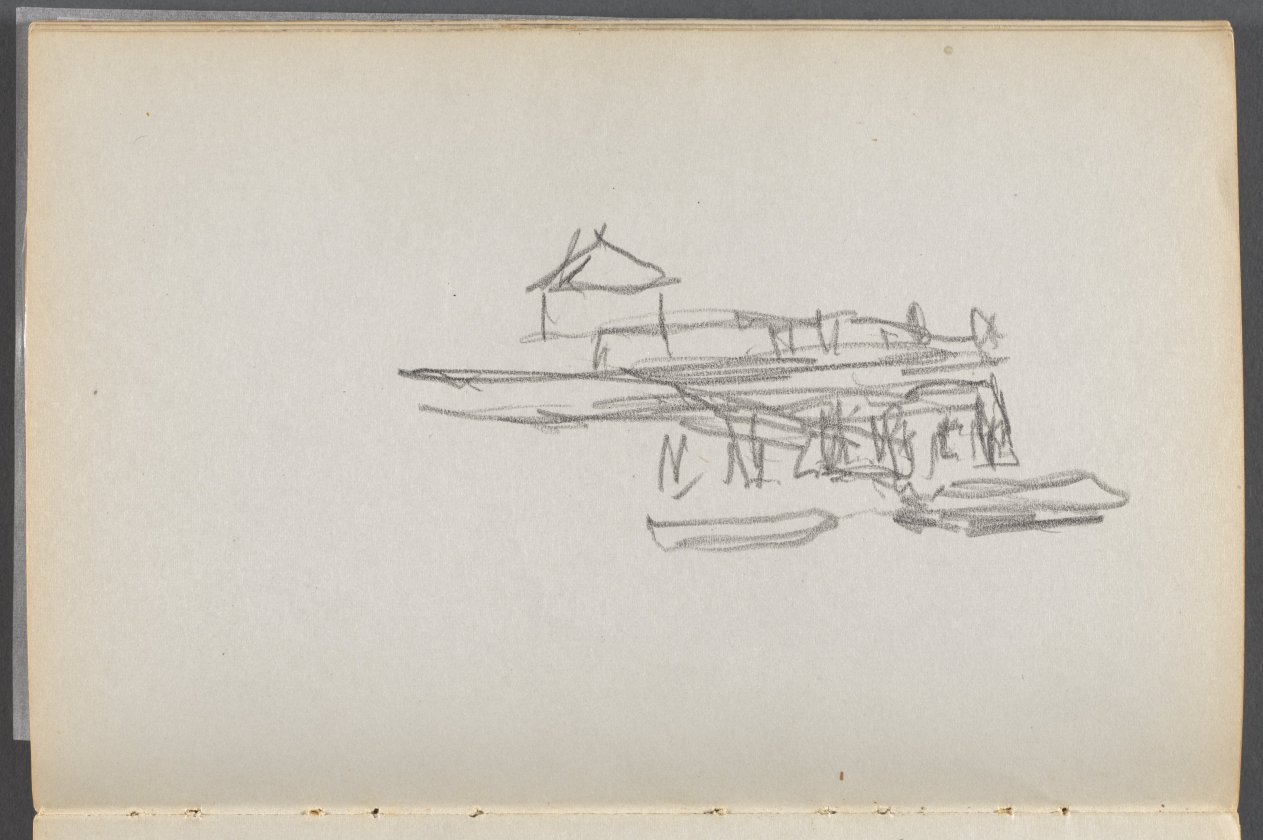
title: Sketchbook, The Dells, N° 127, page 060: Dock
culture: America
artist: Maurice Prendergast (American, born Newfoundland [now Canada], 1858–1924)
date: c. 1919–1921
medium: graphite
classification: Bound Volume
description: This sketchbook contains 59 pages of graphite drawings and 16 watercolors made at various locations on Cape Ann, Massachusetts.